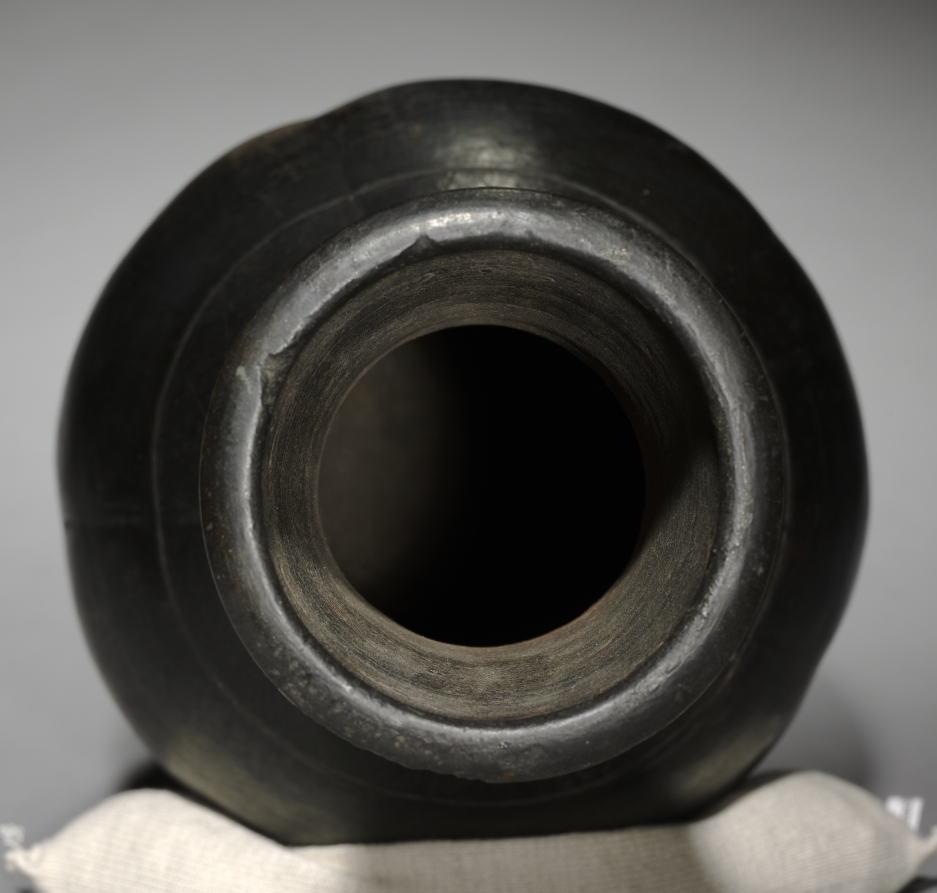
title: Vase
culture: Northeast China, Liao dynasty (916-1125)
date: 916–1125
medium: burnished stoneware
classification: Ceramic